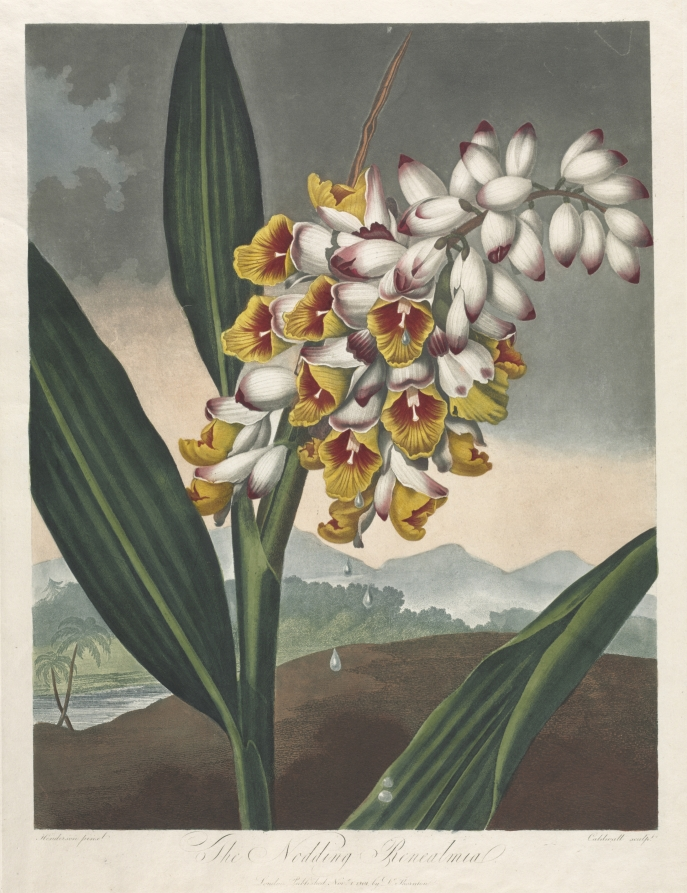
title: The Temple of Flora, or Garden of Nature: The Nodding Renealmia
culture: England, late 18th-early 19th Century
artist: Robert John Thornton (British, 1768–1837)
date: 1801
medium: aquatint, stipple and line engraving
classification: Print